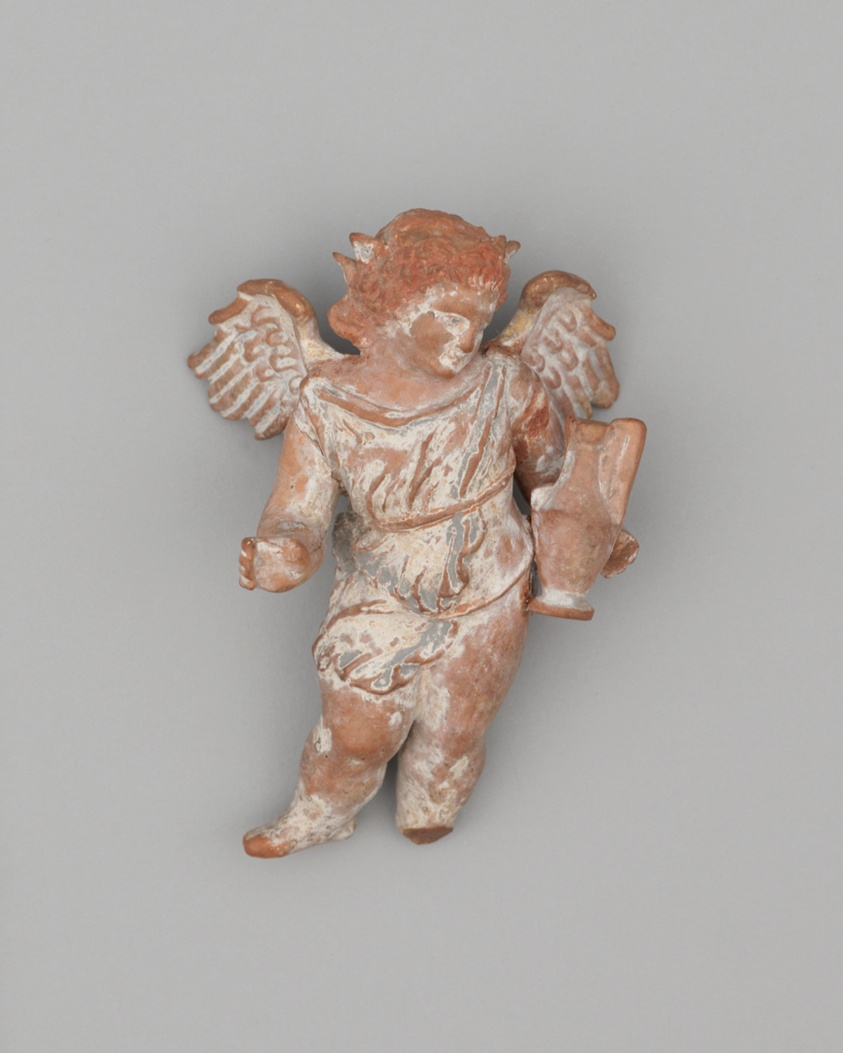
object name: Sculpture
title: Statuette of Eros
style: greek, ancient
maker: Greek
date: 3rd-2nd century BCE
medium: terracotta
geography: Greece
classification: earthenware; ceramics; sculpture; ancient art